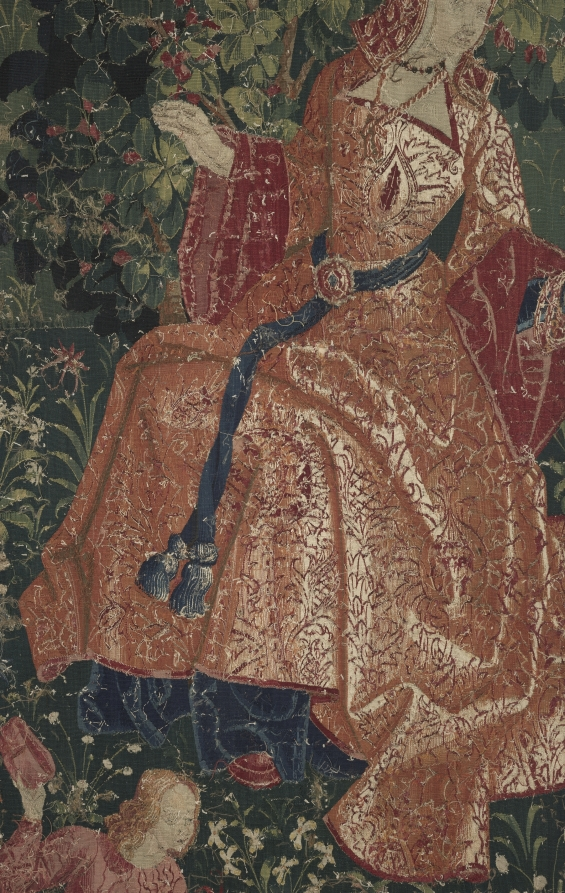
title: Youth (from Chateau de Chaumont set)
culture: France, Lyon(?), early 16th century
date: 1512–15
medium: silk and wool; tapestry weave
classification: Tapestry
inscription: French verse in Gothic letters translates as follows: Youth triumphs while its heart is healthy, And when it seems to hold all in its hand. But this triumph is without eternity. Here one sees the example full well: Those who are happy hide death in thier heart. Let the young heed this warning.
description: Louise of Savoy (1476-1531), queen mother of King Francis I, is depicted here in a sumptuous brocaded velvet in the center. She addresses youthful figures including Éléonore, Pierre Sala’s daughter who is facing her future husband, Hector. On the right, King Louis XII (died 1514) stands in front of the Chateau Langais where he had married Anne of Brittany. Above is Hector’s deceased father with a partially concealed skull under his robe, while a woman expresses surprise at the sight. The verse in Old French at the top states that youthful happiness is not eternal: Youth makes sounds as long as its heart is healthy, And thinks that it holds all in its hand. But this triumph is not eternal. Here you see clearly an example: He that is happy has death in his breast. Of this you people should take note.